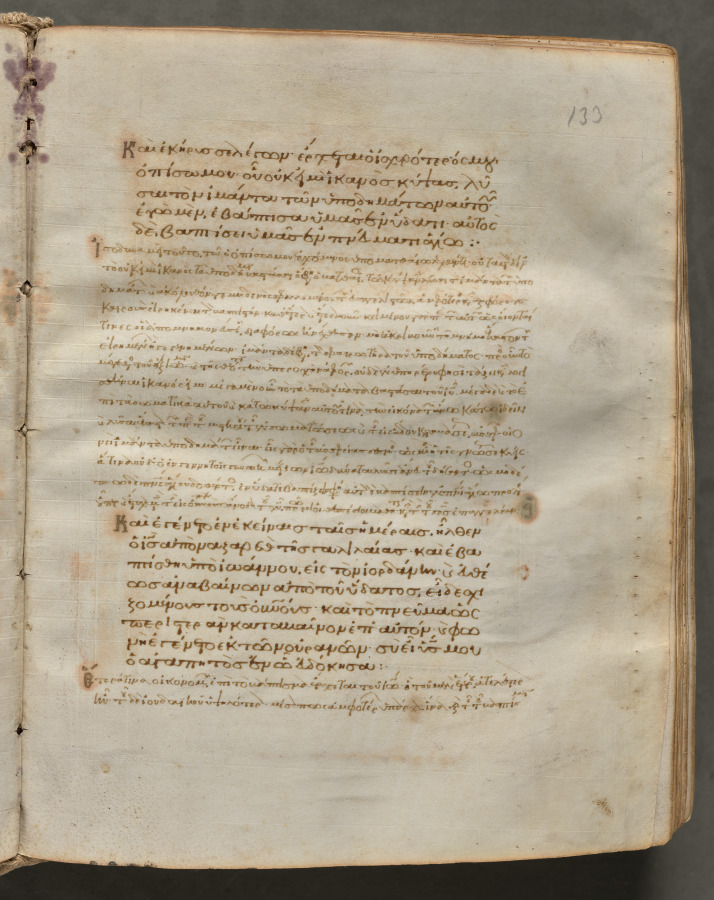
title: Text, folio 133 (recto), from a Gospel Book with Commentaries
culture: Byzantium, Constantinople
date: c. 1000–1100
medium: ink, tempera, and gold on vellum; leather binding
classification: Bound Volume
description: Each of the four gospels in this book opens on a page with brilliantly illuminated borders depicting the author of the text as well as birds-principally peacocks, symbols of the immortality of the soul-and fountains, representing the fountain of life and the salvation of the soul. This volume consists of 428 leaves with texts in Greek. Its level of sophistication suggests that it was probably written and decorated in a monastery in Constantinople.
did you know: Gospel Books were carried in procession through Byzantine churches.